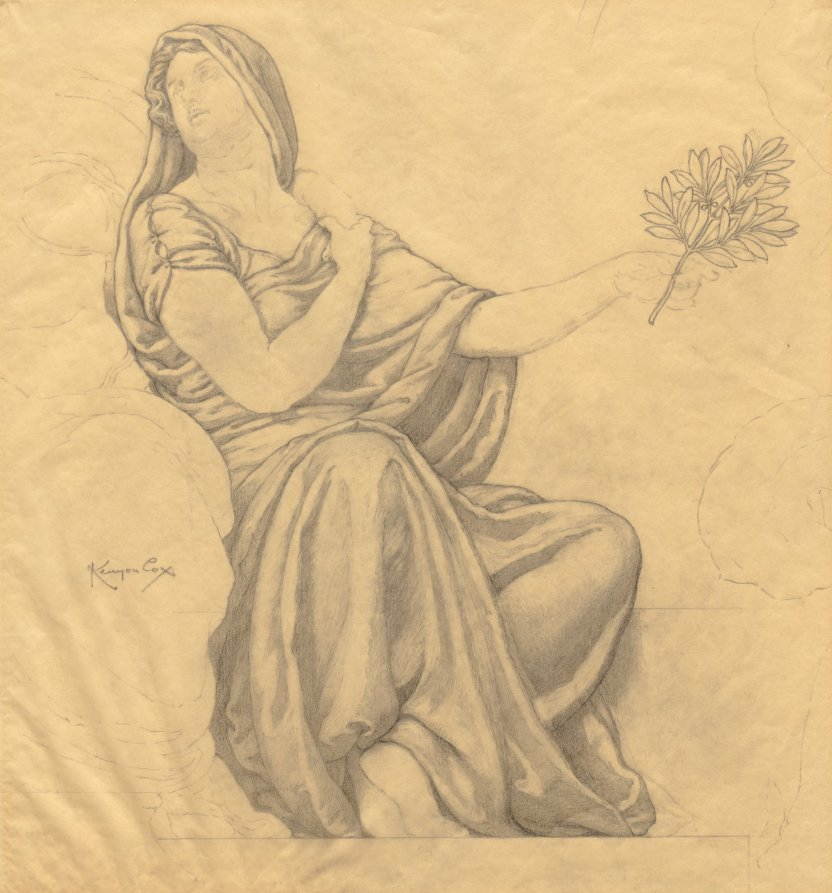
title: Sketch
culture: America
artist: Kenyon Cox (American, 1856–1919)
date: 1912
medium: graphite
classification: Drawing